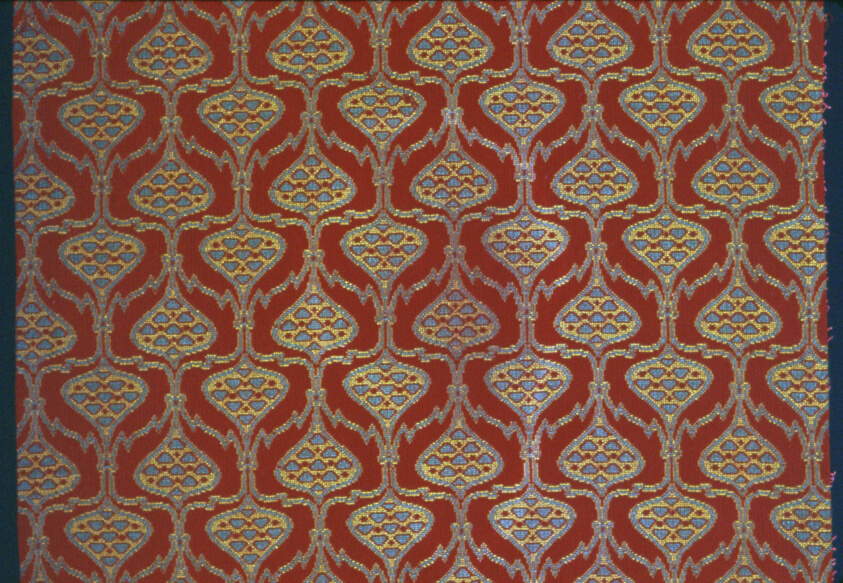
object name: Textile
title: Panel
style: Arts and Crafts Movement, british, 19th century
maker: Designed by Arthur Heygate Mackmurdo (English, 1851–1942); England, London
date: c. 1886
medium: Cotton and wool, warp-faced plain weave with supplementary patterning wefts tied by supplementary binding warps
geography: London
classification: textile; weaving